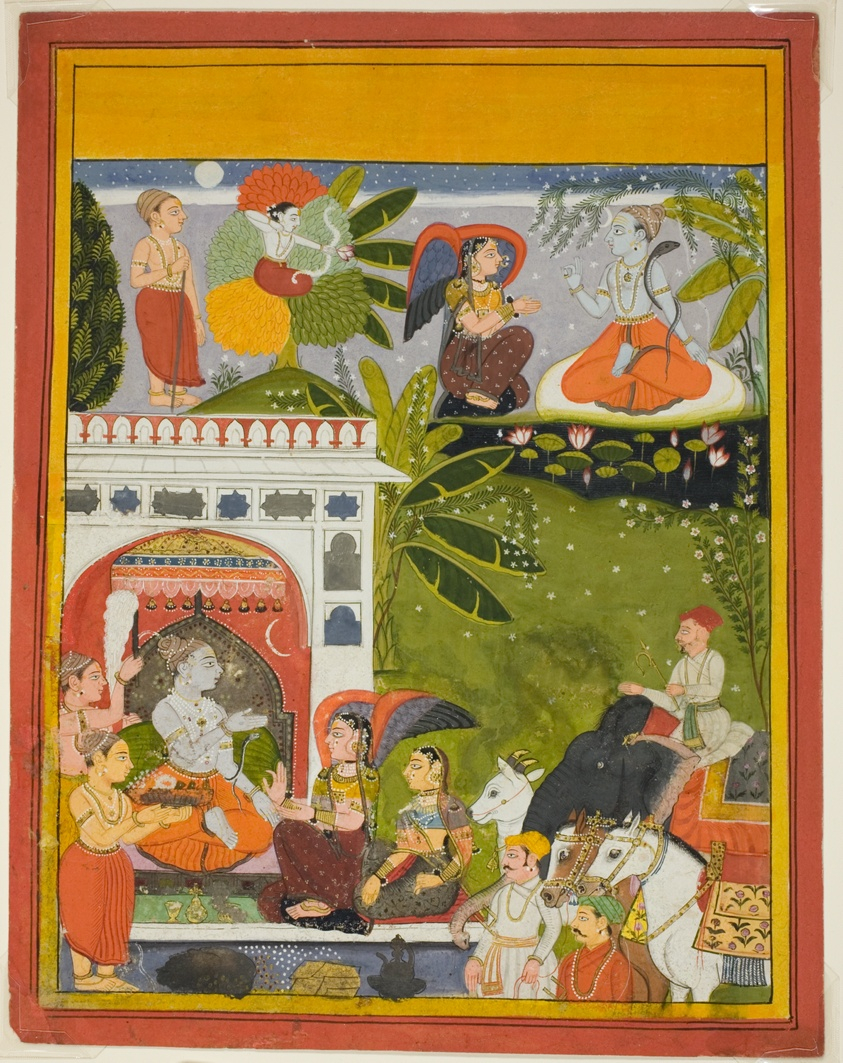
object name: Painting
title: Kama Shoots a Love Arrow at Shiva, from a copy of the Song of Gauri (Gita-Gauri)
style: South Asian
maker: India; Rajasthan, Mewar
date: c. 1675-1680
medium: Opaque watercolor and gold on paper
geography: India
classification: watercolor; painting